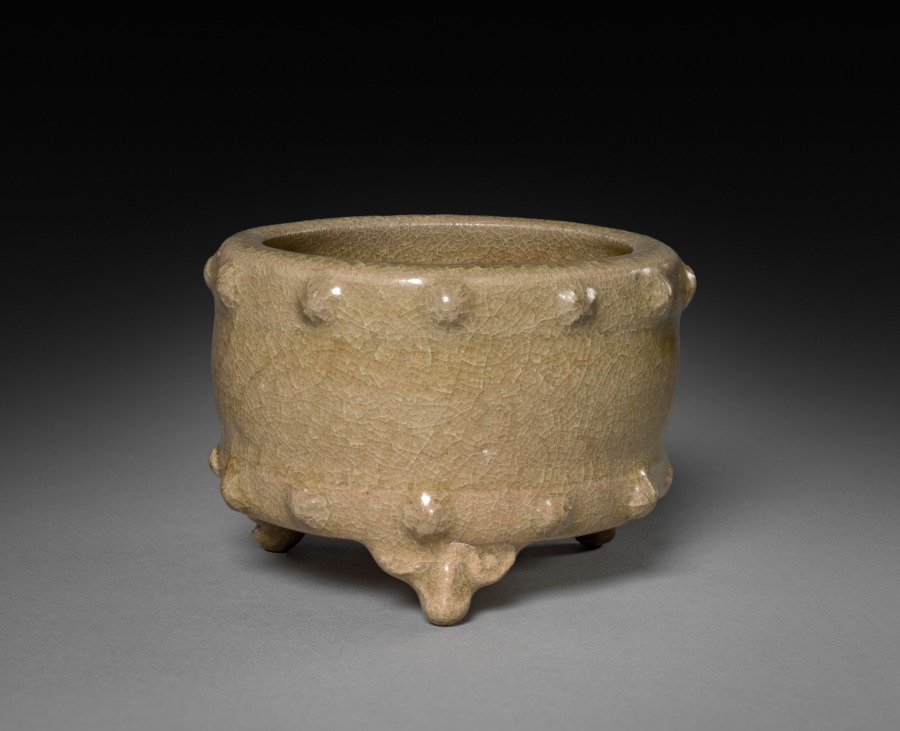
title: Incense Burner: Southern Celadon Ware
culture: China, Yuan dynasty (1271-1368)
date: 1271–1368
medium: glazed buff stoneware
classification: Ceramic